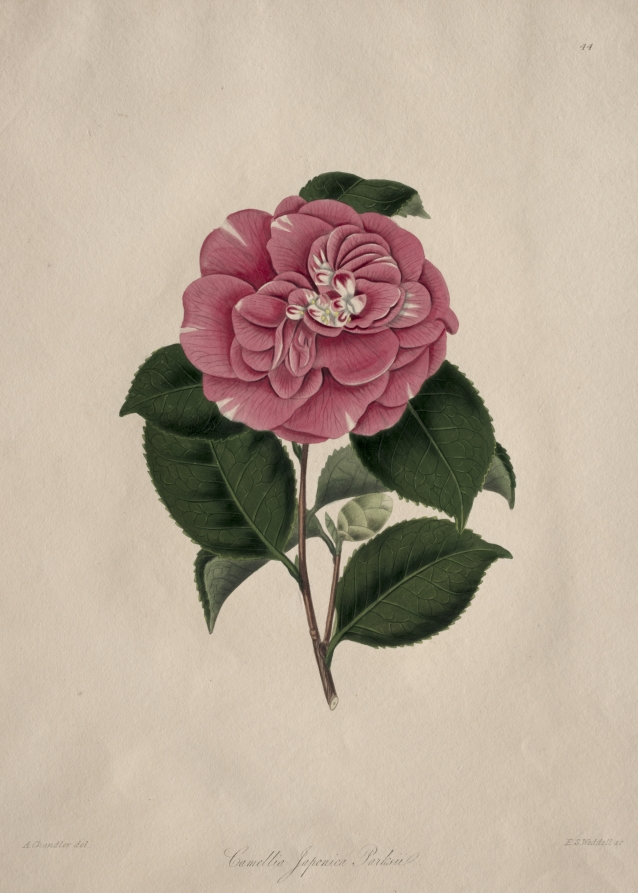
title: Illustrations and descriptions of...the Natural Order Camellieae: No. 44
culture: England, 18th century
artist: Alfred Chandler (British)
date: c. 1820–96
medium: engraving, hand-colored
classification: Print